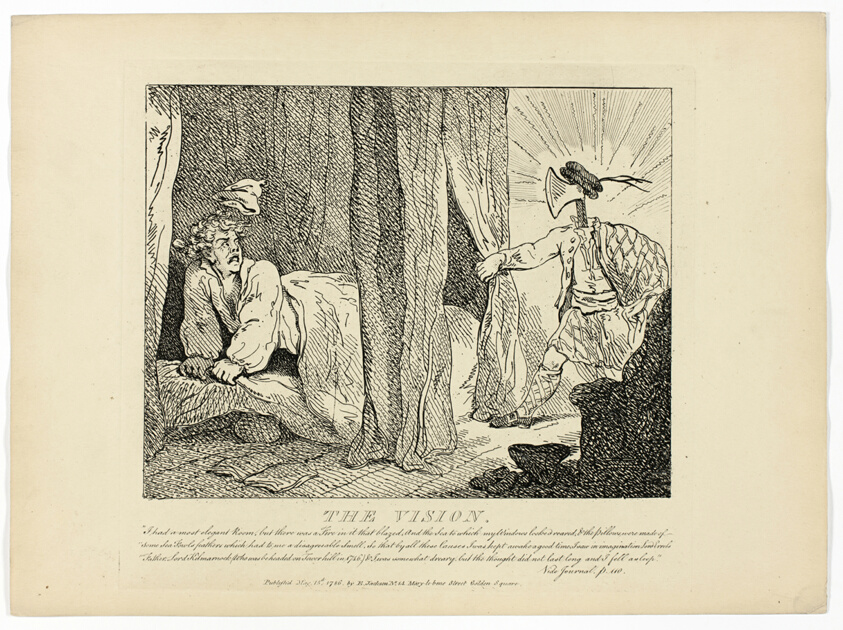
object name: Print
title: The Vision, from Boswell's Tour of the Hebrides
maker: Thomas Rowlandson (English, 1756-1827)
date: 1786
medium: Etching on paper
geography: England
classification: etching; print; prints and drawing